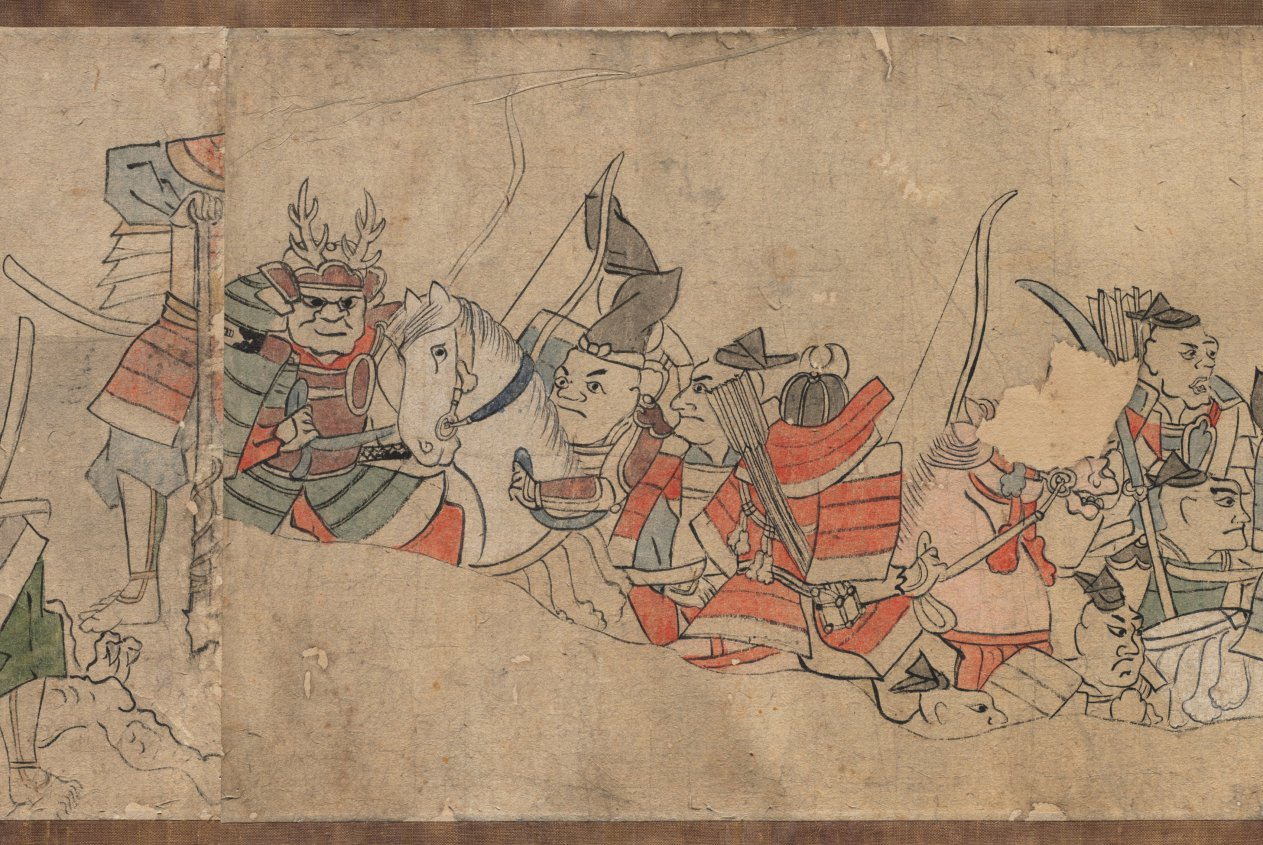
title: Oeyama Engi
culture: Japan, Edo period (1615–1868)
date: 1615–1868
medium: one of a pair of handscrolls; ink and color on paper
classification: Painting